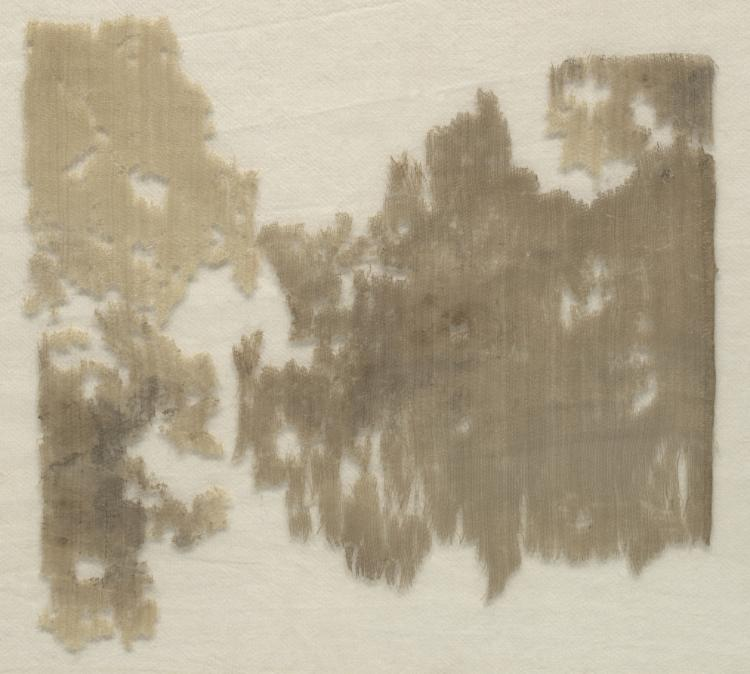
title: Fragment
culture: China, Song dynasty (960-1279)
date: 900s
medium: silk gauze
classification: Textile